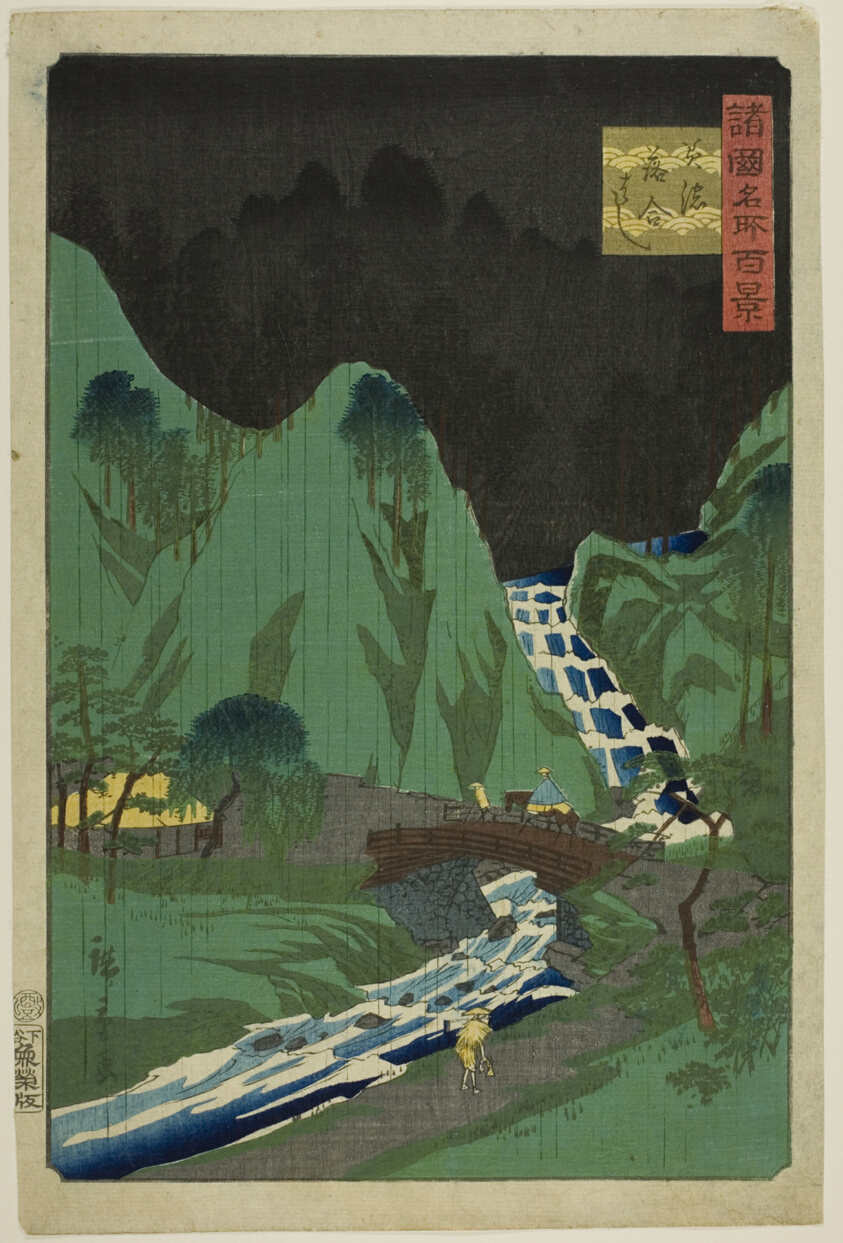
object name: Print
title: Ochiai Bridge, Mino Province (Mino Ochiai bashi) from the series “One Hundred Famous Views in the Various Provinces (Shokoku meisho hyakkei)”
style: Japanese (culture or style)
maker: Utagawa Hiroshige II (Shigenobu) (Japanese, 1826–1869)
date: 1861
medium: Color woodblock print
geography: Japan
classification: woodblock print; print